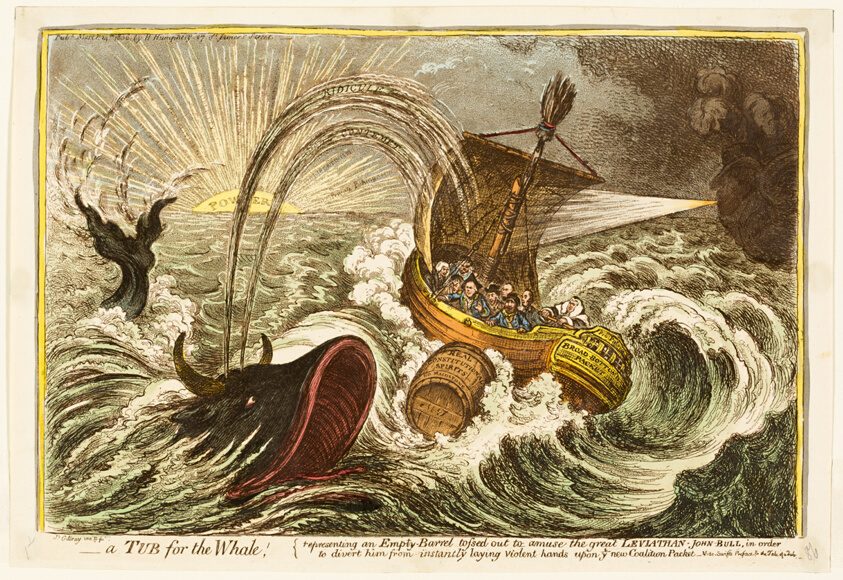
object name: Print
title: A Tub for the Whale!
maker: James Gillray (English, 1756-1815); published by Hannah Humphrey (English, c. 1745-1818)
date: published March 14, 1806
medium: Hand-colored etching and aquatint on cream wove paper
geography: England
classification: etching; print; prints and drawing